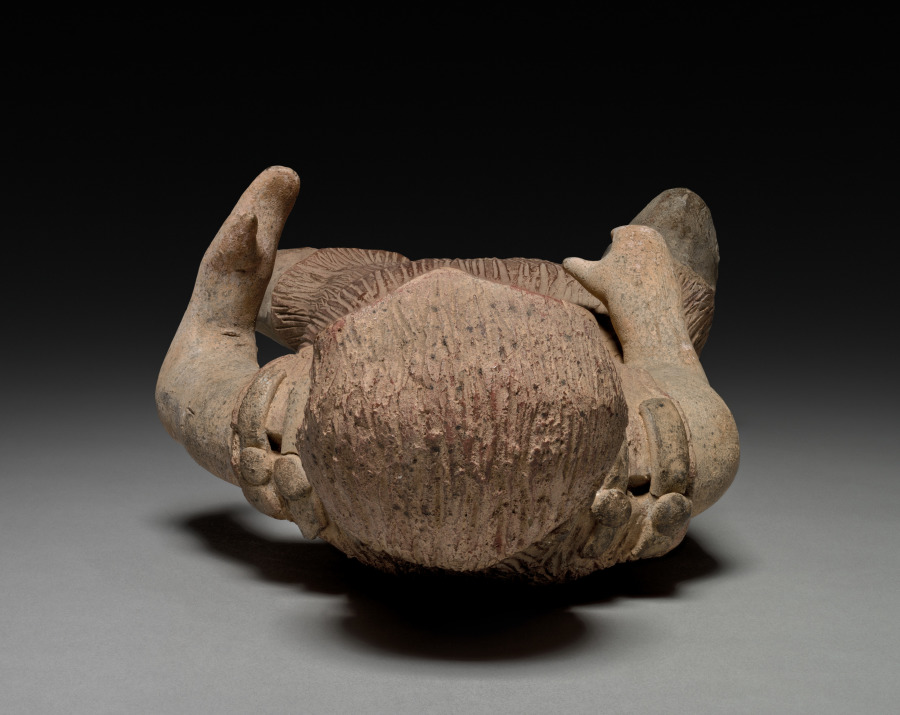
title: Figure of a Warrior in Leather Armor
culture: China, Modern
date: 20th Century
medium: buff earthenware with traces of polychromy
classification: Sculpture